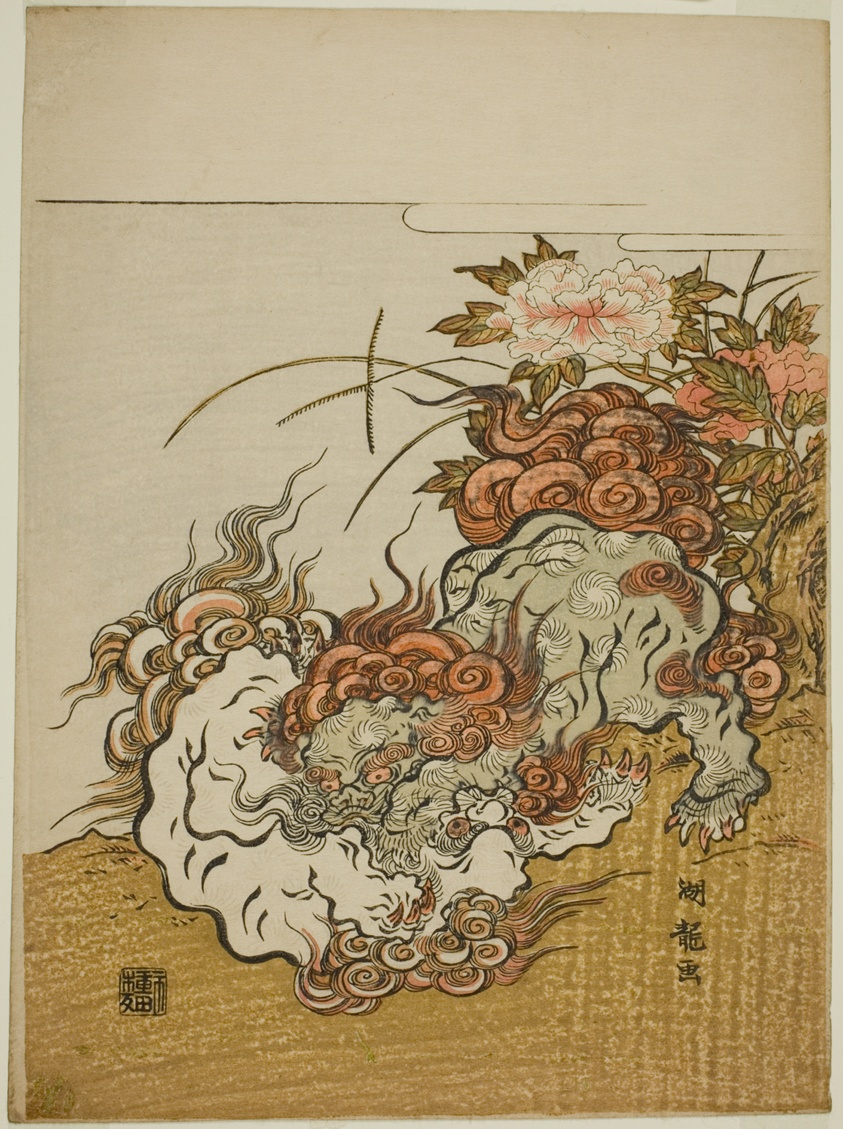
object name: Print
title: Two Fighting Lions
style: Japanese (culture or style)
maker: Isoda Koryusai (Japanese, 1735-1790)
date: c. 1772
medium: Color woodblock print; chuban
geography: Japan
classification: woodblock print; print; asian art